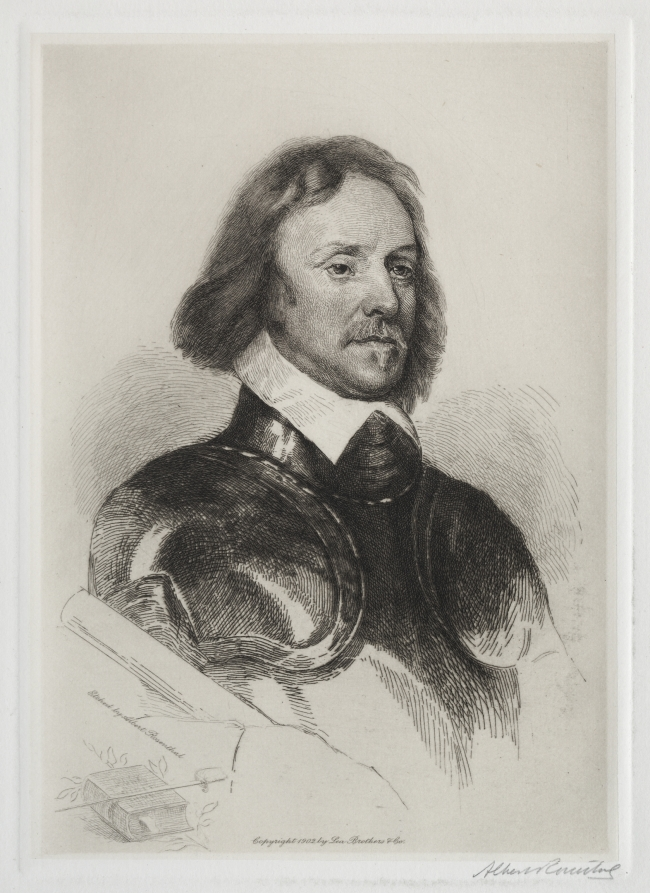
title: Oliver Cromwell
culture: America, early 20th Century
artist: Albert Rosenthal (American, 1863–1939)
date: 1902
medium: etching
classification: Print